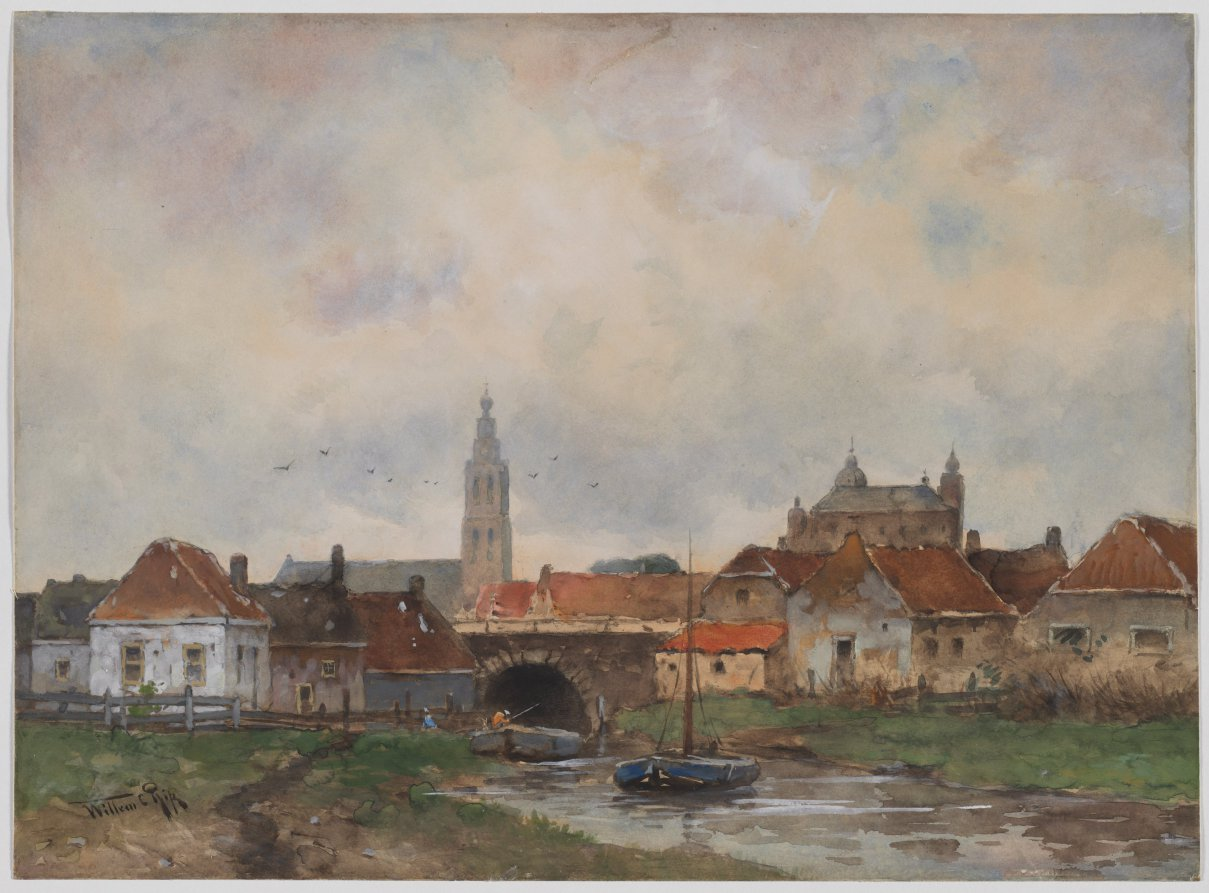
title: Upper Lock at Steenbergen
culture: Netherlands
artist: Willem Cornelis Rip (Dutch, 1856–1922)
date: 1800s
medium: watercolor and gouache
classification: Drawing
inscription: signed, lower left, in watercolor: Willem C Rik [line over Willem] ; VERSO, upper left, in graphite: 8 [circled] ; upper left, in graphite: W/2239 ; center, in graphite: 150ºº ; by artist, lower center, in graphite: "Hooge Sluis te Steenbergen," / Willem C. Rik [line over Willem] / den [double underlined] Haag ; lower center, in graphite: 500 [illegible]